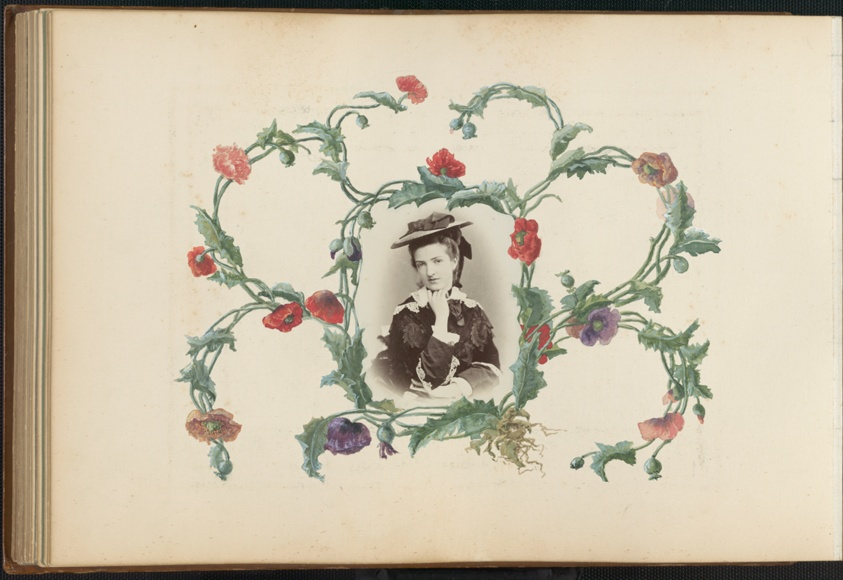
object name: Photograph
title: The Madame B Album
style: 19th century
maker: Marie-Blanche Hennelle Fournier (French, 1831–1906)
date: 1870s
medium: Albumen print with watercolor (in album)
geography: France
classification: photograph; albumen silver print; photography